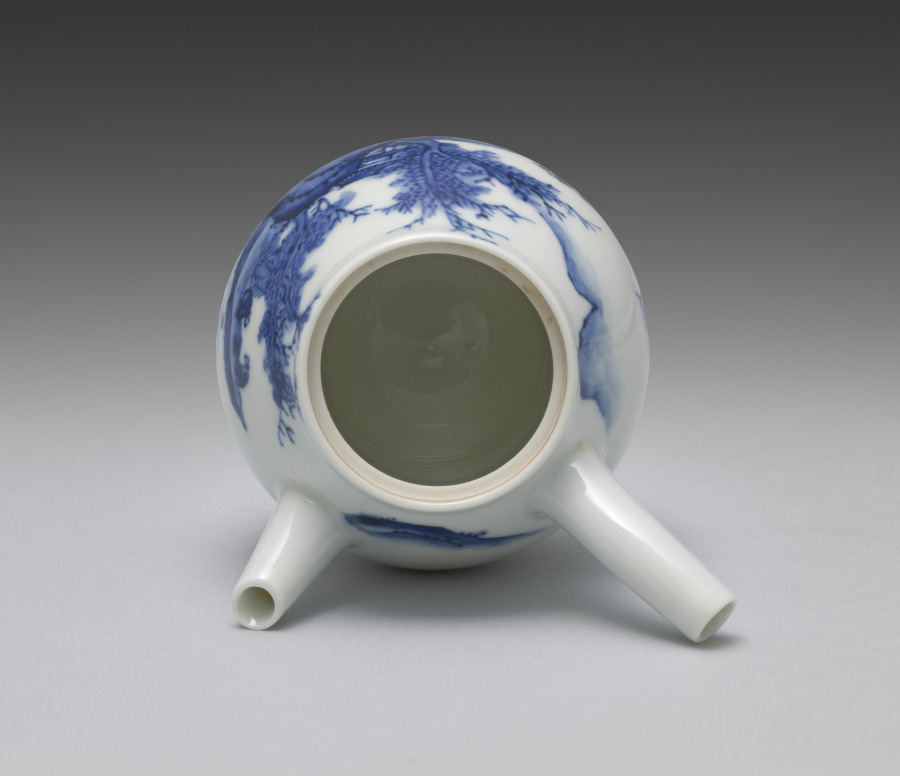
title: Teapot from Tea Set with Chinese Landscape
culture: Japan, Meiji period (1868–1912)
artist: Seifū Yohei III (Japanese, 1851–1914)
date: 1893–1914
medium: Porcelain with underglaze blue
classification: Ceramic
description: This tea set with idyllic lakeside Chinese landscapes has a side-handled pot called a kyūsu, used for steeping, straining, and serving tea. Unlike some others, this set also has a yuzamashi, a container used to cool boiled water to just the right temperature for the best flavor when steeping. Seifū Yohei III’s painting teacher, Tanomura Chokunyū (1814–1907), made a visual record of famous sencha events that shows how these kinds of porcelains fit with objects such as a stove and kettle to form a complete set of utensils for tea preparation, and with ensembles of decorative objects meant to inspire creativity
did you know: The side-handled pot is called a kyūsu, used for steeping, straining, and serving tea.